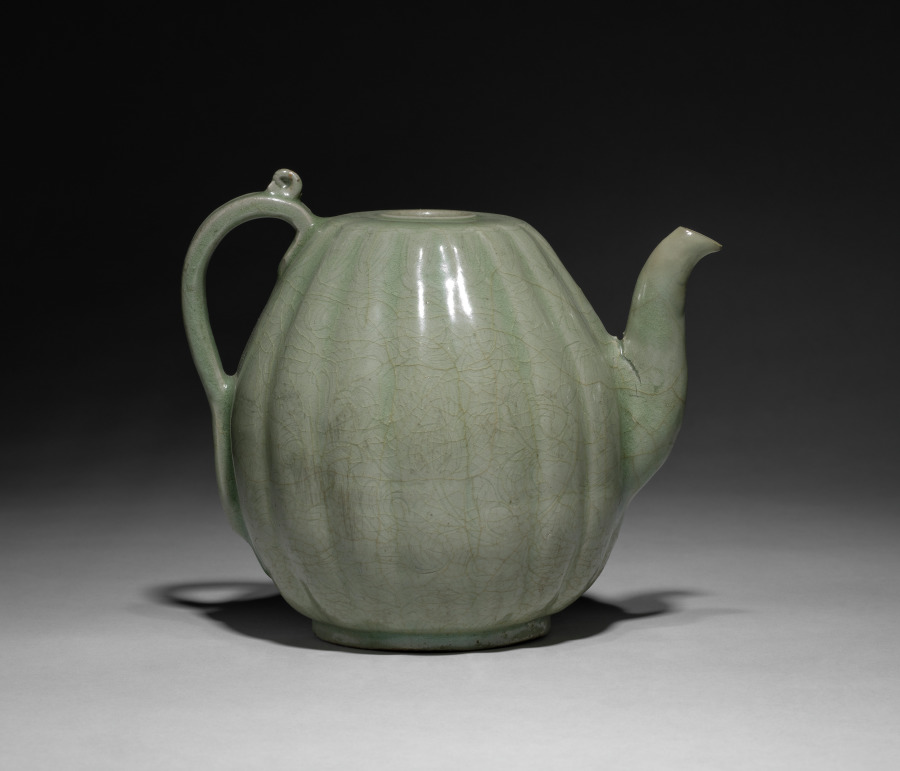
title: Wine Pot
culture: Korea, Goryeo dynasty (918–1392)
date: 918–1392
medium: pottery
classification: Ceramic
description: As early as the seventh century, the practice of drinking tea and wine became an important part of elite culture in Korea. Elites of the Goryeo period commissioned a variety of types of utensils and vessels including this elegant pot, not only to make their drinking experience more exciting, but also to show their appreciation of nature.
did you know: Originally the lid was not coupled with this pot.